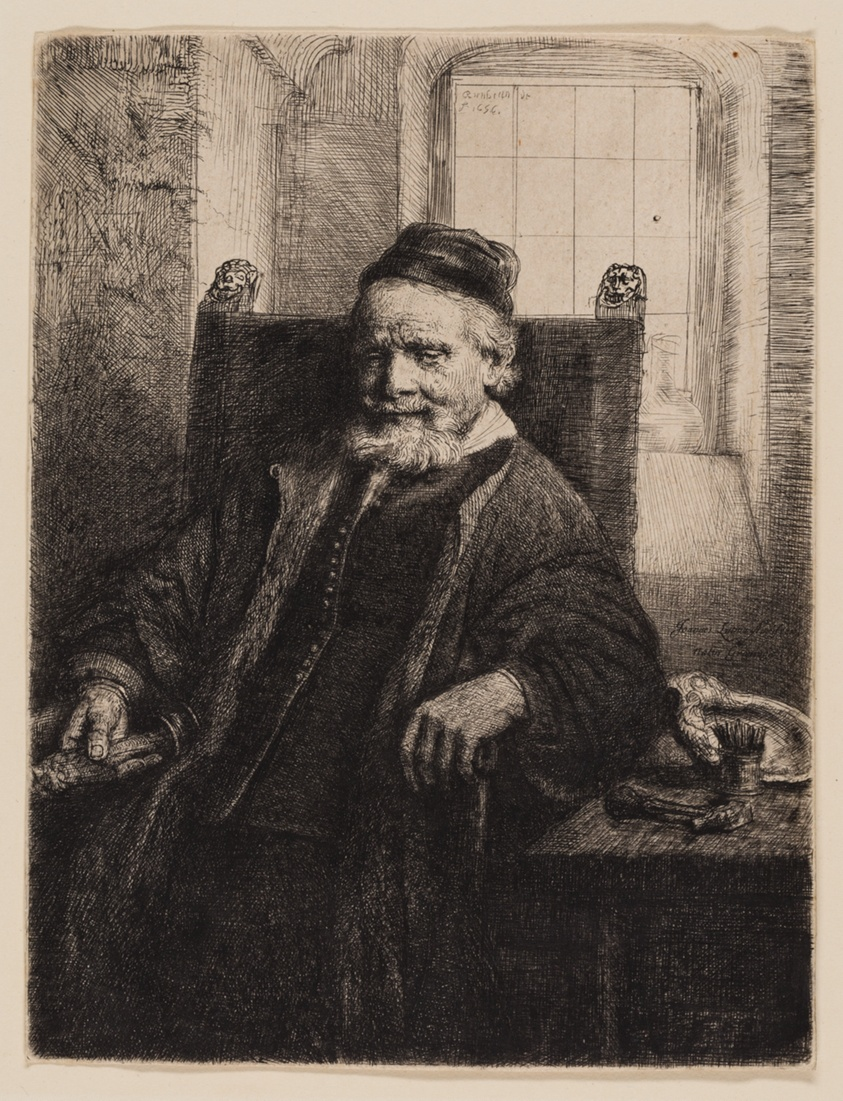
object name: Print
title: Jan Lutma, Goldsmith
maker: Rembrandt van Rijn (Dutch, 1606-1669)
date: 1656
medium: Etching and drypoint on paper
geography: Holland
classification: etching; print; prints and drawing; paper; drypoint